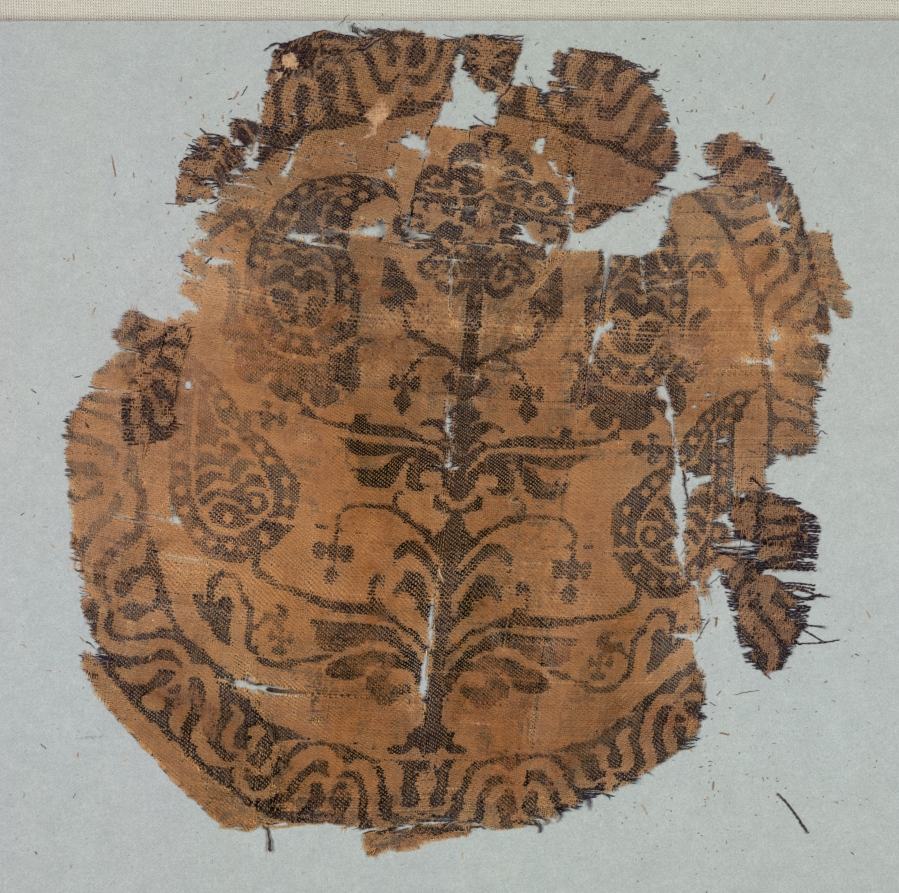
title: Roundel with curvilinear palmette tree, from a tunic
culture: Egypt or Syria(?)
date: 600–850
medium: Silk; complementary weft-faced twill weave with inner warps (samite)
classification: Textile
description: Originally, roundels like this were cut and sewn onto the front and back of a tunic, probably linen, in Egypt. They belong to a sizeable group of comparable silk decorations found in Akhmim, Egypt. In each roundel, a stylized palmette tree is enclosed within a simplified lotus border that evolved from an ancient Egyptian lotus motif.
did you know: This elaborate pattern was woven on a large, early loom known as a drawloom that automatically repeated designs across the width of the fabric.